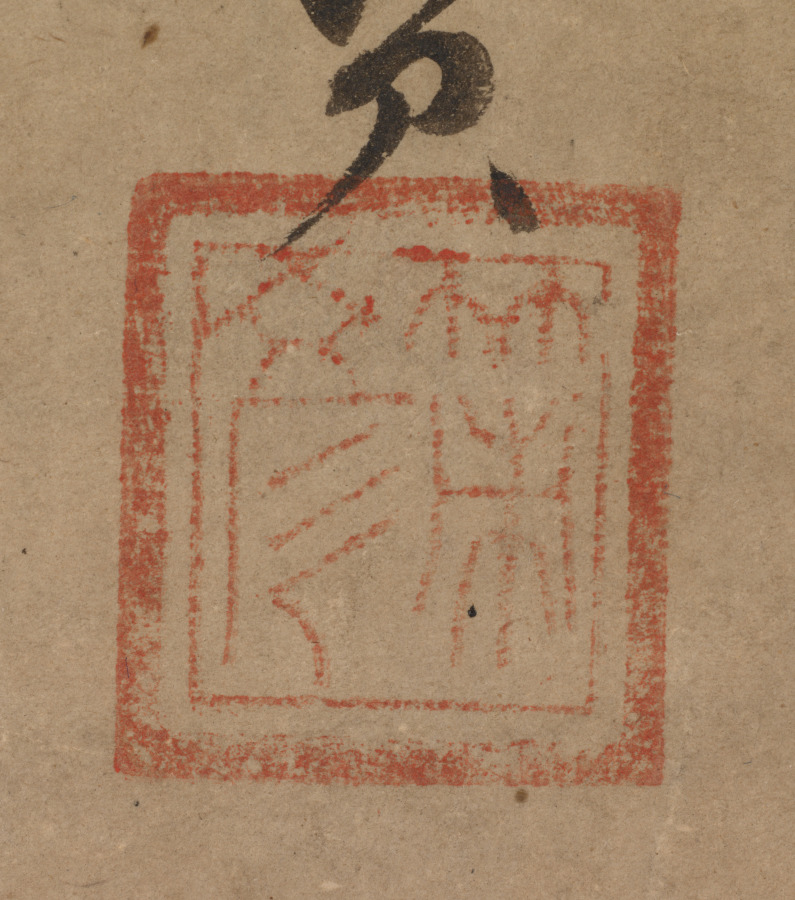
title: Portrait of Sugawara Michizane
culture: Japan, Muromachi period (1392–1573)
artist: Yōgetsu (Japanese, active late 1400s to early 1500s)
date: late 1400s–early 1500s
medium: hanging scroll; ink and color on paper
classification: Painting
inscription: four-line inscription signed "Sakugen Shūryō" (1501-1579) accompanied by two seals unread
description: Sugawara Michizane (845–903) was a Kyoto aristocrat who died in exile in Dazaifu in Japan’s southern island of Kyushu, having been slandered at court. His vengeful spirit was later pacified by the construction of shrines in his name. His image was incorporated into the repertoire of Zen Buddhist figure painting, which included bodhisattvas, Daoist immortals, and other enlightened beings. Eminent monk Sakugen Shūryō (1501–1579) inscribed this work, which was painted by monk-painter Yōgetsu of Kyushu, who traveled east to study either in Kyoto or Kamakura. The Chinese-style poem is an ode to Michizane in his guise as the deity Tenjin.